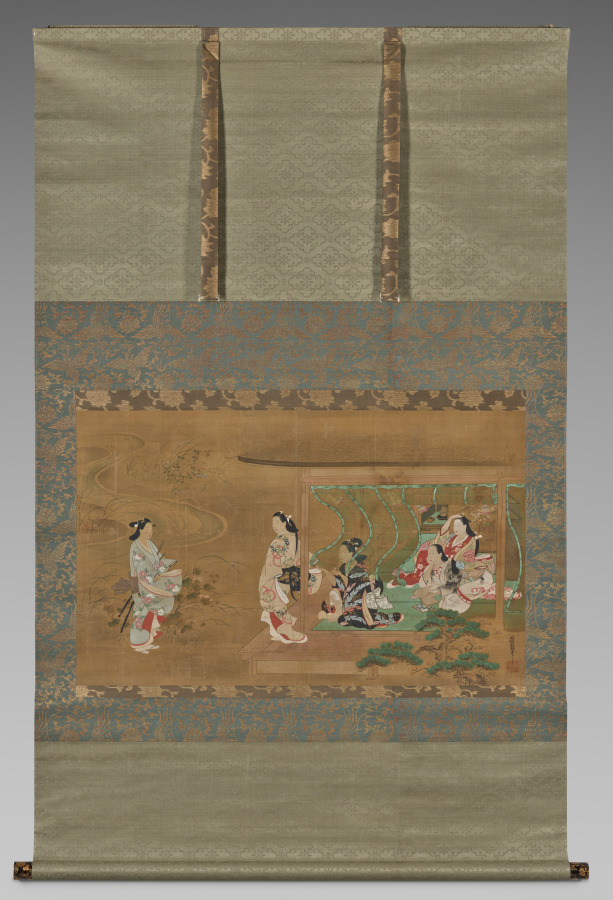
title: Beauty Receiving a Visitor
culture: Japan, Edo period (1615–1868)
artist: Tamura Suio (Japanese, active late 1600s–early 1700s)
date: late 1600s–early 1700s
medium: Hanging scroll; ink and color on silk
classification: Painting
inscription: artist's signature and seal, lower right corner.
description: Here, a person steps out to the engawa, a wood-floored corridor that runs along the outer edge of a house, to greet a visitor as the individual’s companions look on. A strong breeze blows the sleeves of their robes and the translucent blinds enclosing their sitting room. The group’s wealth and high status is signified by the two swords the visitor carries and everyone’s intricately patterned garments. A raised blind lets the viewer peek in to see a black lacquer box decorated with designs in gold powder and a ceramic incense burner on a hexagonal lacquer tray positioned carefully in the room’s display alcove, or toko.